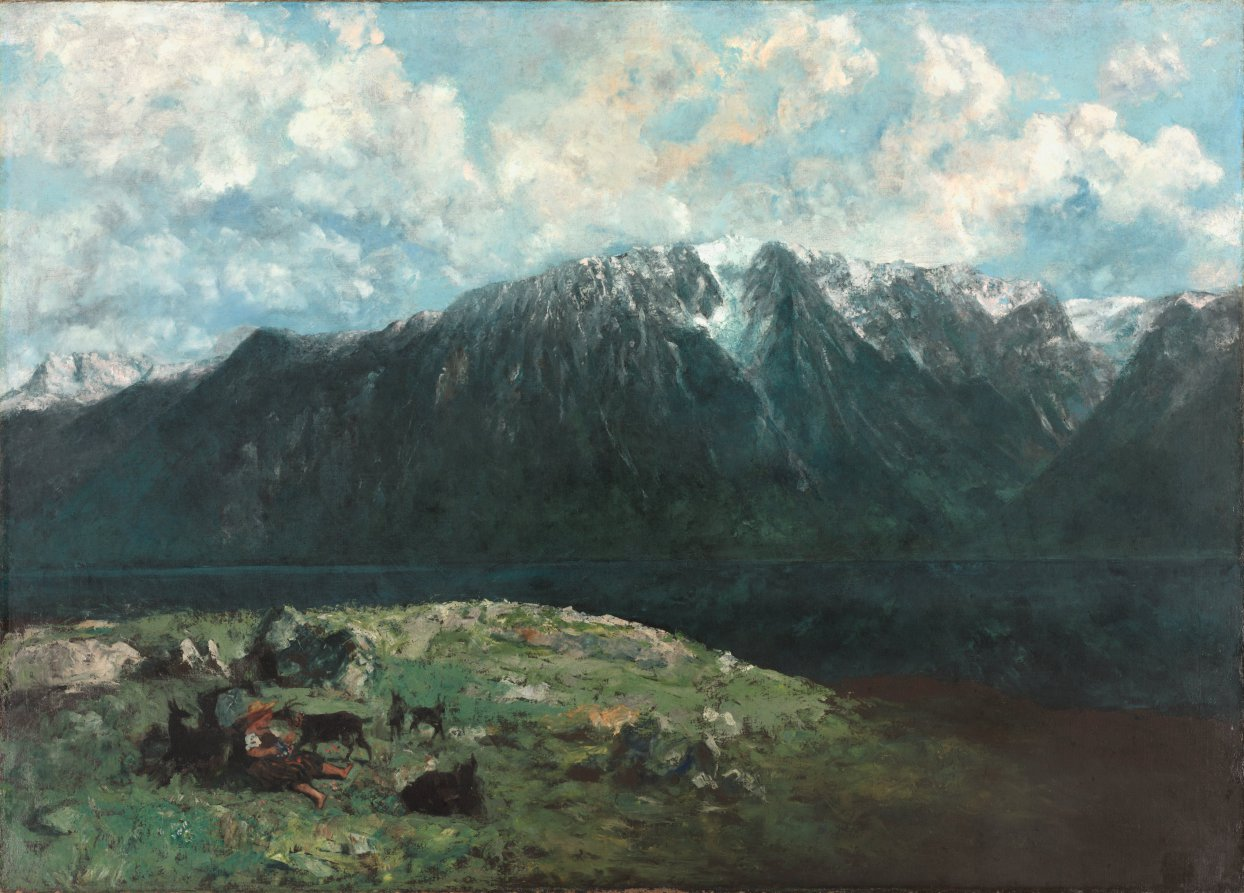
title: Panoramic View of the Alps, Les Dents du Midi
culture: France, 19th century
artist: Gustave Courbet (French, 1819–1877)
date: 1877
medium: oil on fabric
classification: Painting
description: Courbet was still working on this large landscape, intended for the Paris Universal Exposition of 1879, when he died in December 1877. He painted it during his exile in Switzerland, where he had fled after being condemned for subversive activities in the Paris Commune of 1871. The view looks south over Lake Geneva toward the mountains called Les Dents du Midi. While some areas are heavily worked with a palette knife, the lower right remains unfinished.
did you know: This late, unfinished painting reveals some of Courbet's techniques. At the top of the mountains you can see how different brushstrokes and thickly applied paint were used to differentiate the texture of the clouds from the snow.